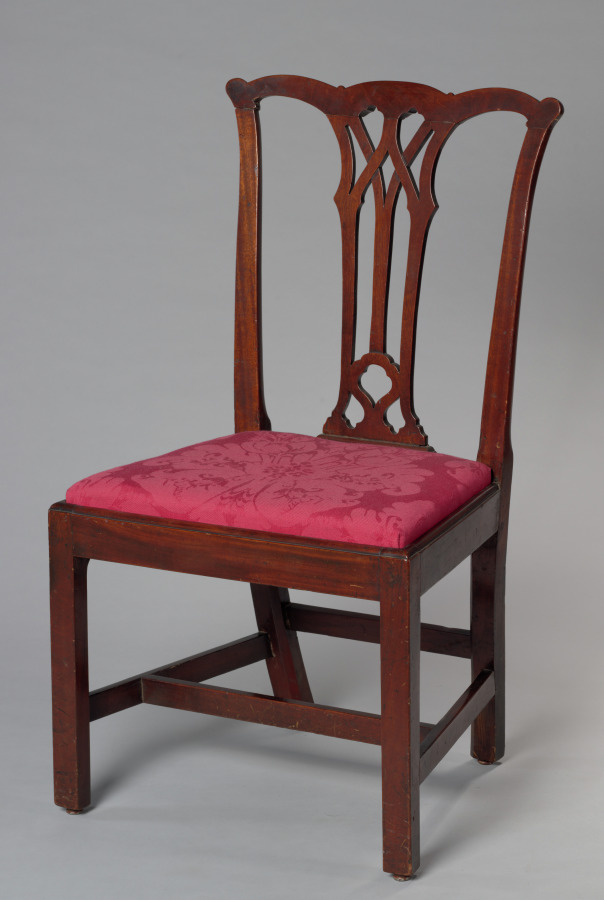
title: Side Chair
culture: America, Pennsylvania, Philadelphia, Chippendale style, 18th century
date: c. 1780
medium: wood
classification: Furniture and woodwork